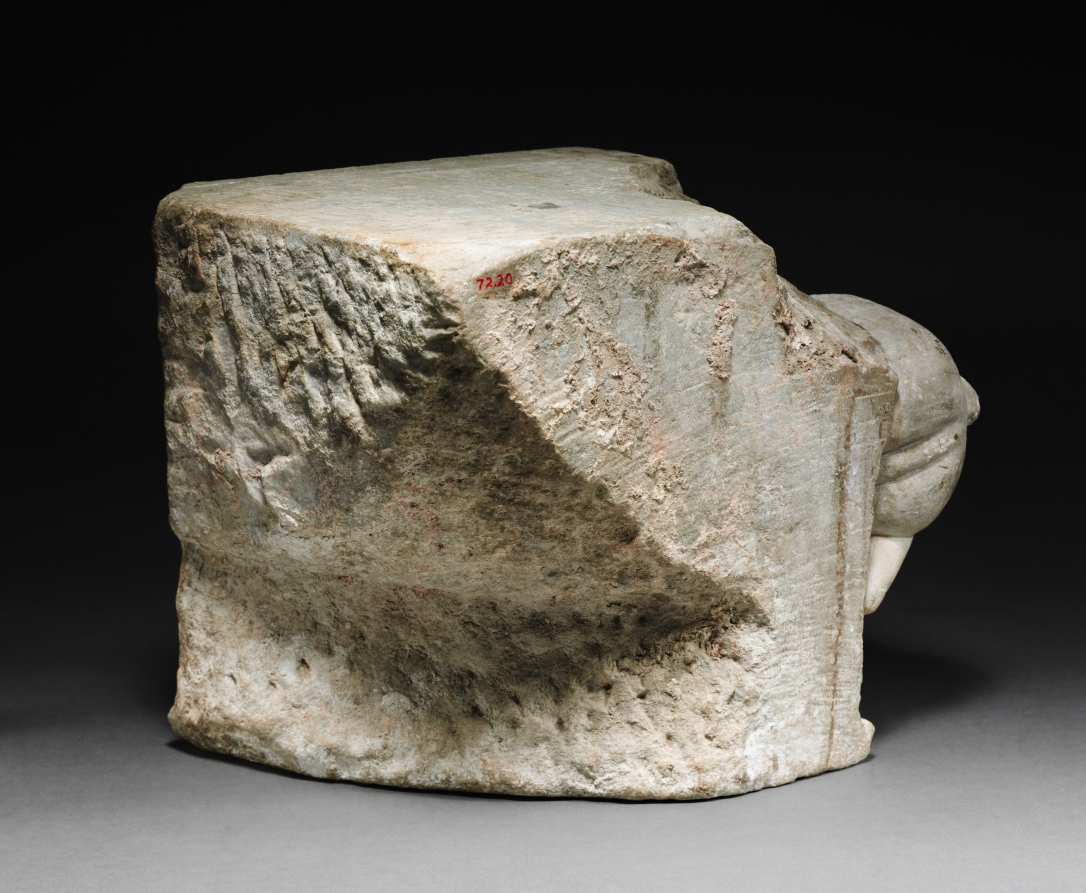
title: Engaged Capital with a Lion and a Basilisk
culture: Northern Italy, Emilia (Bologna?), 12th century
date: 1175–1200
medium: marble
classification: Sculpture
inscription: BASILISC.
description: The basilisk is an imaginary animal, half cock and half snake. According to medieval bestiaries, the basilisk could kill merely by its glance. It was commonly held as the symbol of the devil to be trodden down by Christ, first at the moment of his incarnation and then again during the Last Judgment.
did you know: This capital depicts a struggle between the good lion and the evil basilisk, a legendary reptile from myth. While the artist would not have encountered the mythical serpent, it is likely he never saw a real lion either based on its cartoonish appearance in this sculpture.